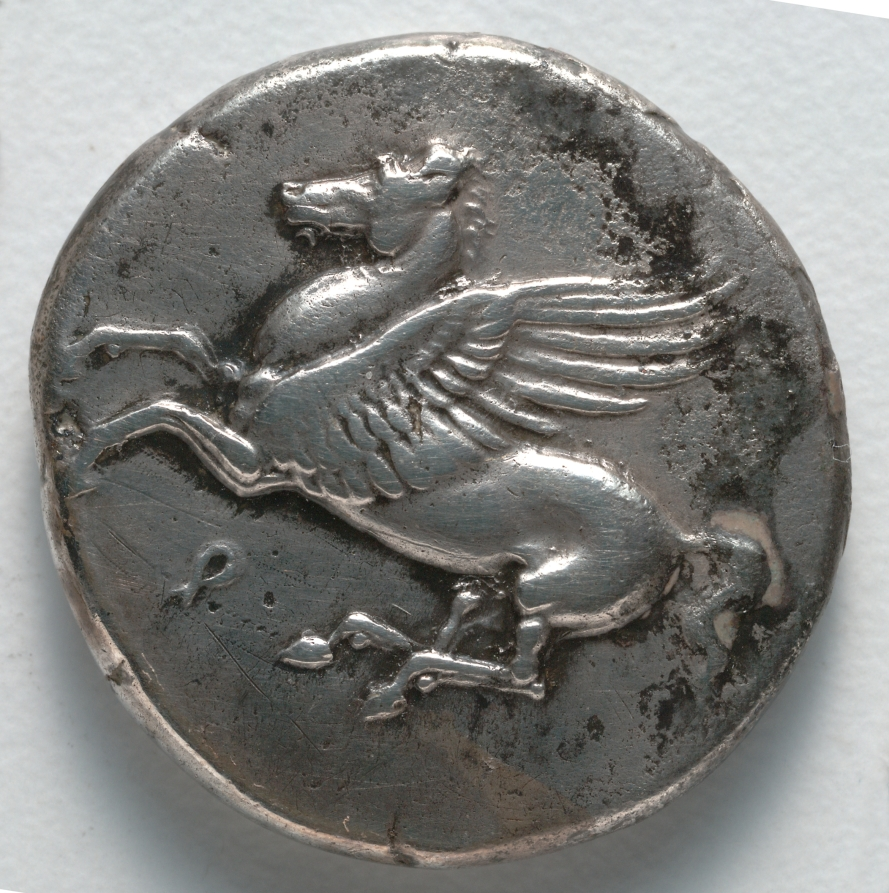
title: Stater: Pegasos (obverse)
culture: Greece, Corinth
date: c. 350–338 BCE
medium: silver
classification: Coins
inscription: Ϙ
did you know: The archaic letter Ϙ, koppa, on the obverse abbreviates the early spelling of Corinth (ϘΟΡΙΝΘΟΣ).